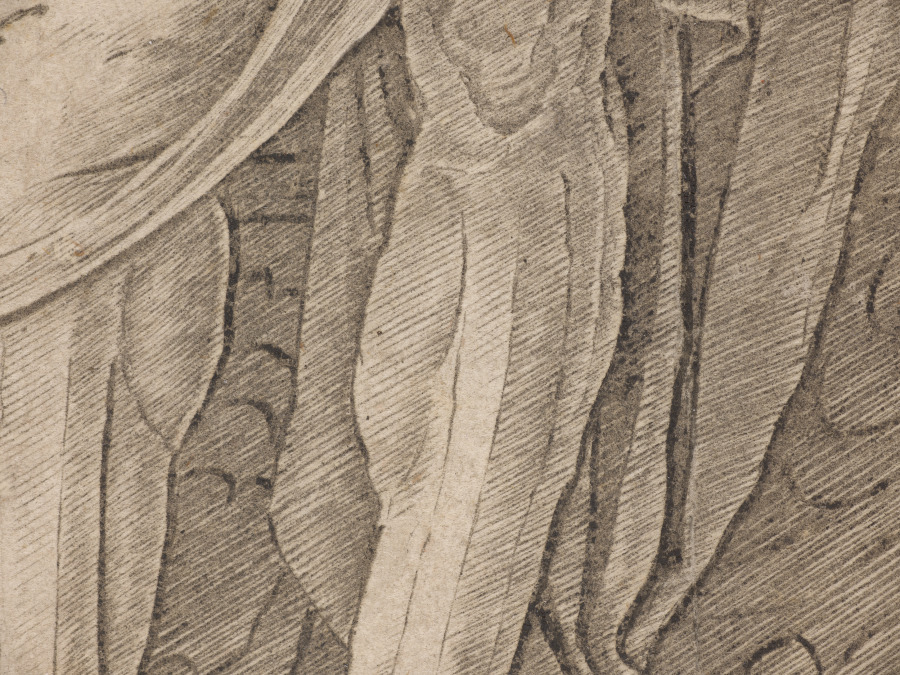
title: The Risen Christ Between Saints Andrew and Longinus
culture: Italy, 15th century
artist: Andrea Mantegna (Italian, about 1431–1506)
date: early 1470s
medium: engraving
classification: Print